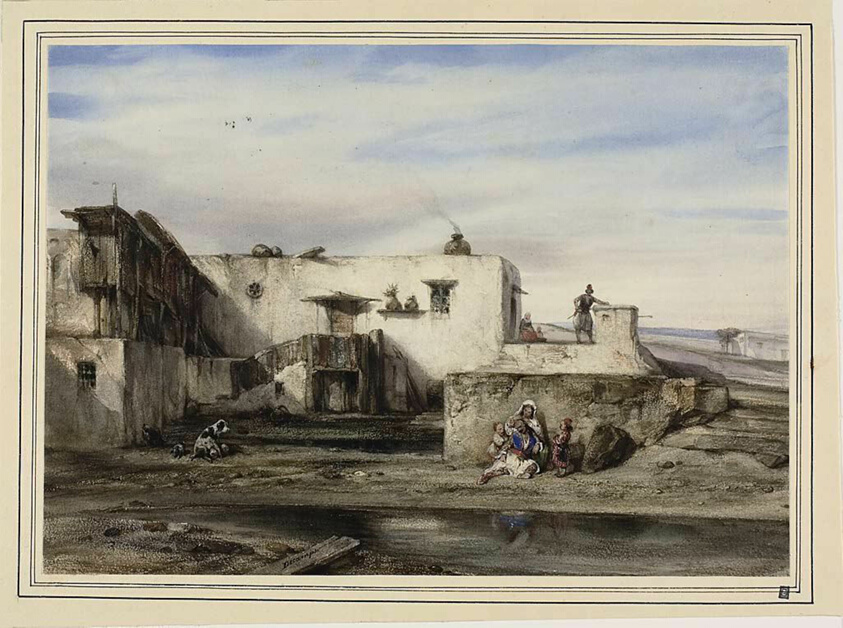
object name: Drawing and Watercolor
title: Greek Village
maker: Alexandre Gabriel Decamps (French, 1803-1860)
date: 1828/30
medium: Watercolor, with touches of gouache, on cream wove paper, tipped onto cream wove paper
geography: France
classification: watercolor; drawings (visual works); prints and drawing